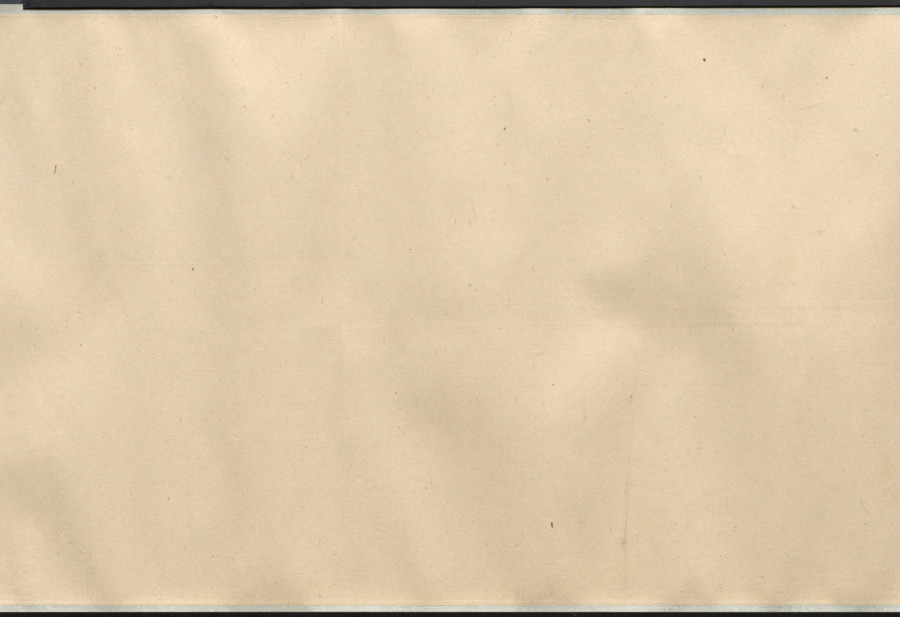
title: Rocks, Orchid, and Bamboo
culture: China, Qing dynasty (1644-1911)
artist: Shitao (Chinese, 1642–1707)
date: 1662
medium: handscroll; ink on paper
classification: Painting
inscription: Title colophon in four characters with signature and two seals on gold-flecked paper.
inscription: Artist's signature, inscription (with date of 1662), five seals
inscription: Colophon with two seals.